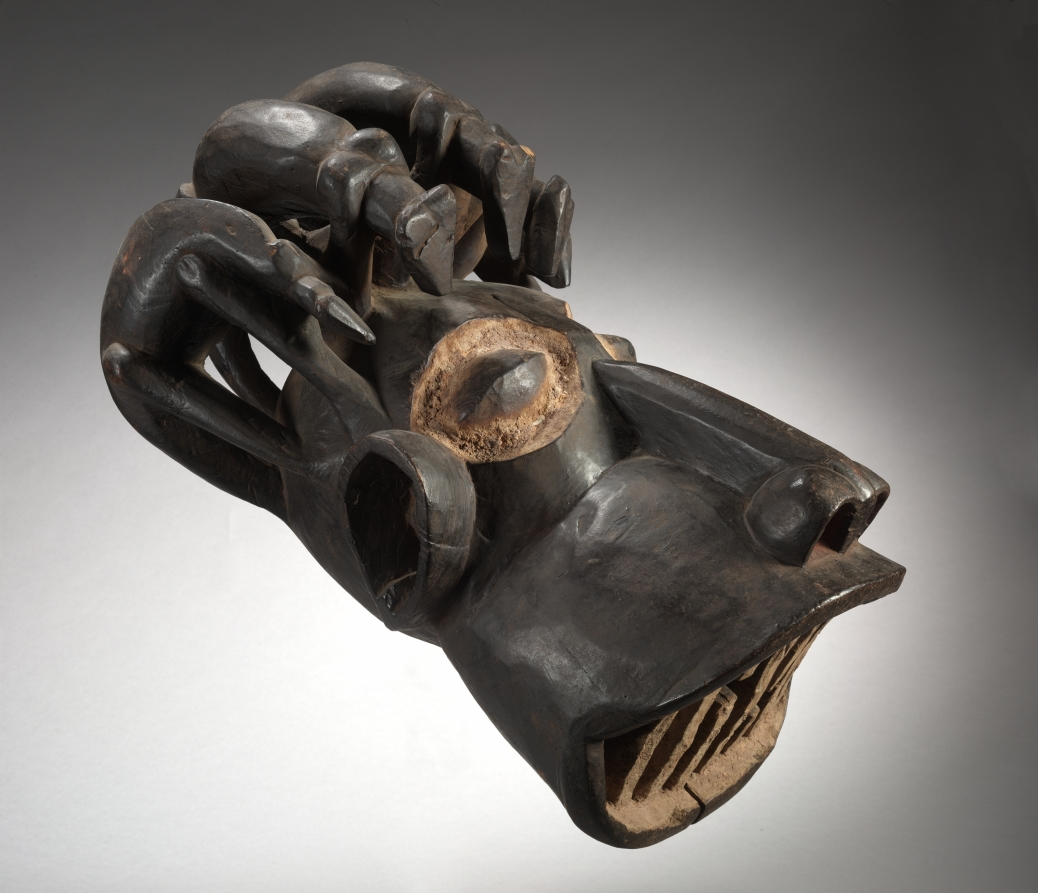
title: Helmet Mask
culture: Africa, Central Africa, Cameroon, possibly Kom-style maker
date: early 1900s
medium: Wood, paint, organic material, and iron alloy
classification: Mask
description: Deliberately distorted and exaggerated facial features reflect the awesome powers of a great chief. The quadrupeds on the mask’s head suggest the close association between the leopard and the king. In the Cameroon grasslands, masks are typically related to a regulatory society that guards ancestral mores; society members wear the masks and dance in the secrecy of the night.